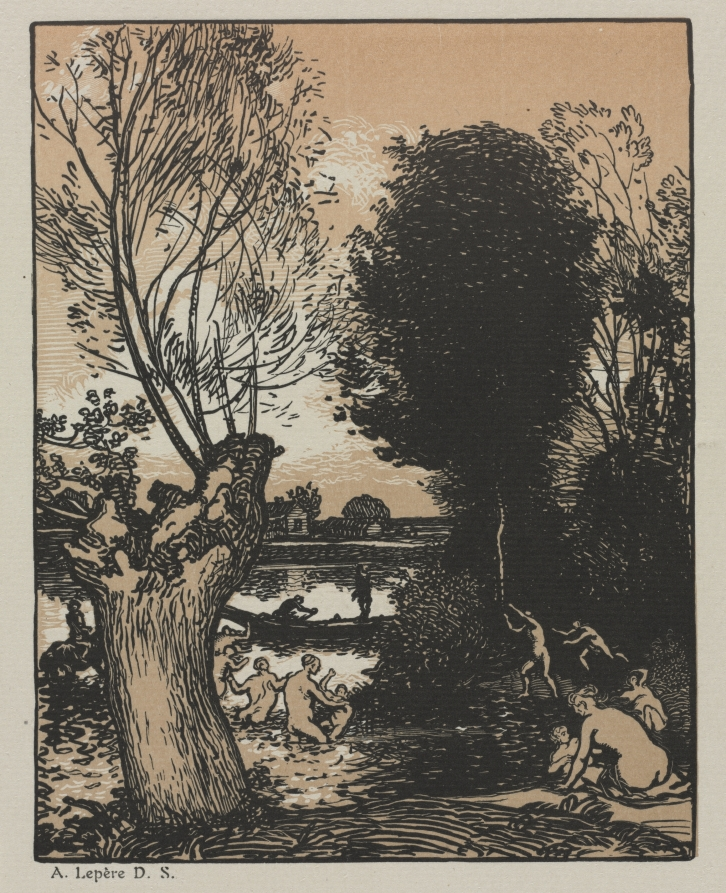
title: Summer Evening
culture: France, 19th century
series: Annuaire de Graveure Francaise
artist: Auguste Louis Lepère (French, 1849–1918)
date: 1910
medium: woodcut in black and brown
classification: Print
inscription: On one page of text: Un Camaïeu Inédit by Auguste Lepère